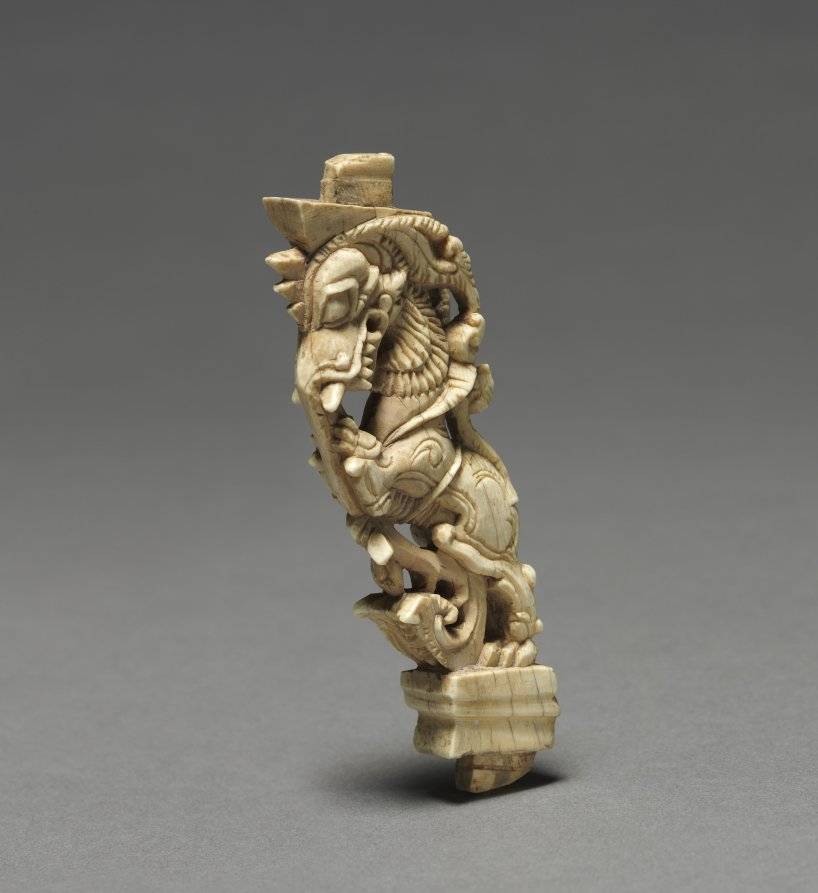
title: Carved Bracket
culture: South India, probably Madurai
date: 1600s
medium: Ivory with traces of pigment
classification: Ivory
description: Composite creatures with the body of a lion, tusks and trunk of an elephant, and horns of an antelope are standard elements of medieval Indian architecture and furniture. Traces of pigment indicate that these ivory furniture facings were brightly painted.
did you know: These composite beasts are called yali or vyala.